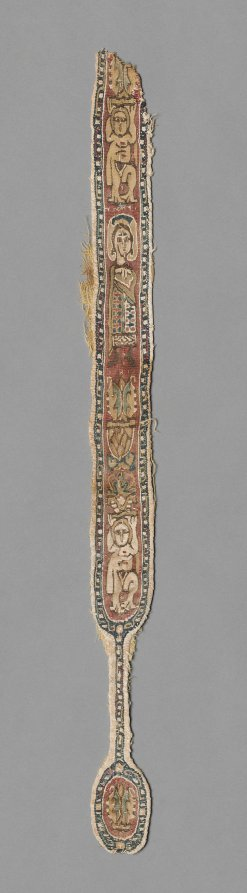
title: Fragment of a Clavus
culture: Egypt, Abbasid period (?), 8th - 9th century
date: 700s - 800s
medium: tapestry; linen and wool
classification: Textile